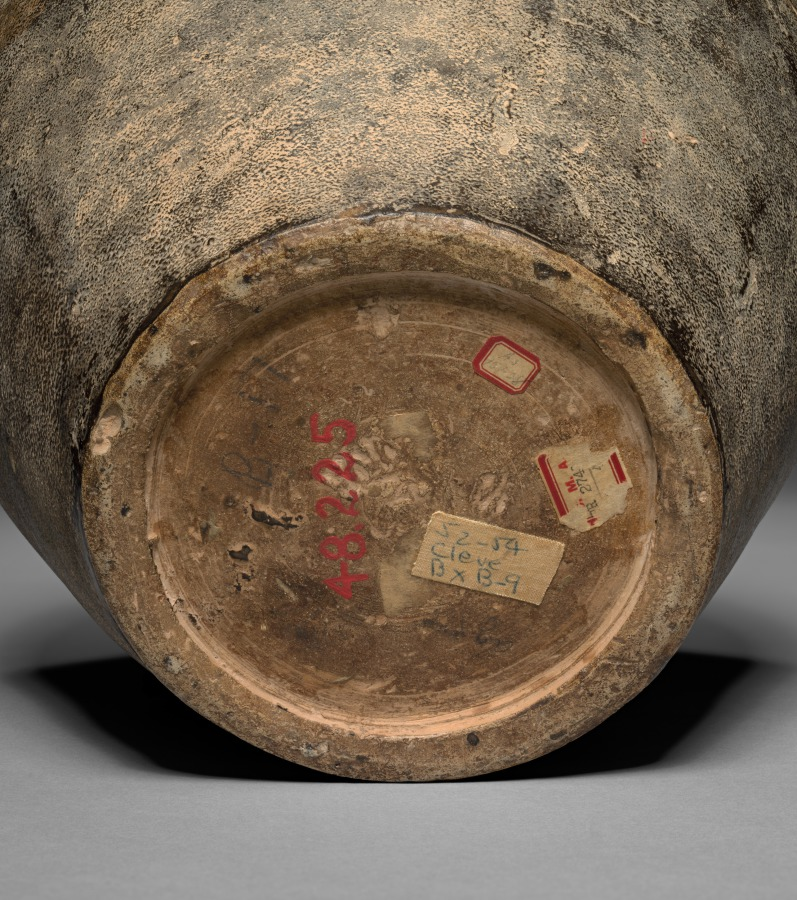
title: Jar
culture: China, Yuan dynasty (1271-1368)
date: 1271–1368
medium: glazed grayish-buff stoneware with incised decoration and underglaze slip application, Cizhou ware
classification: Ceramic